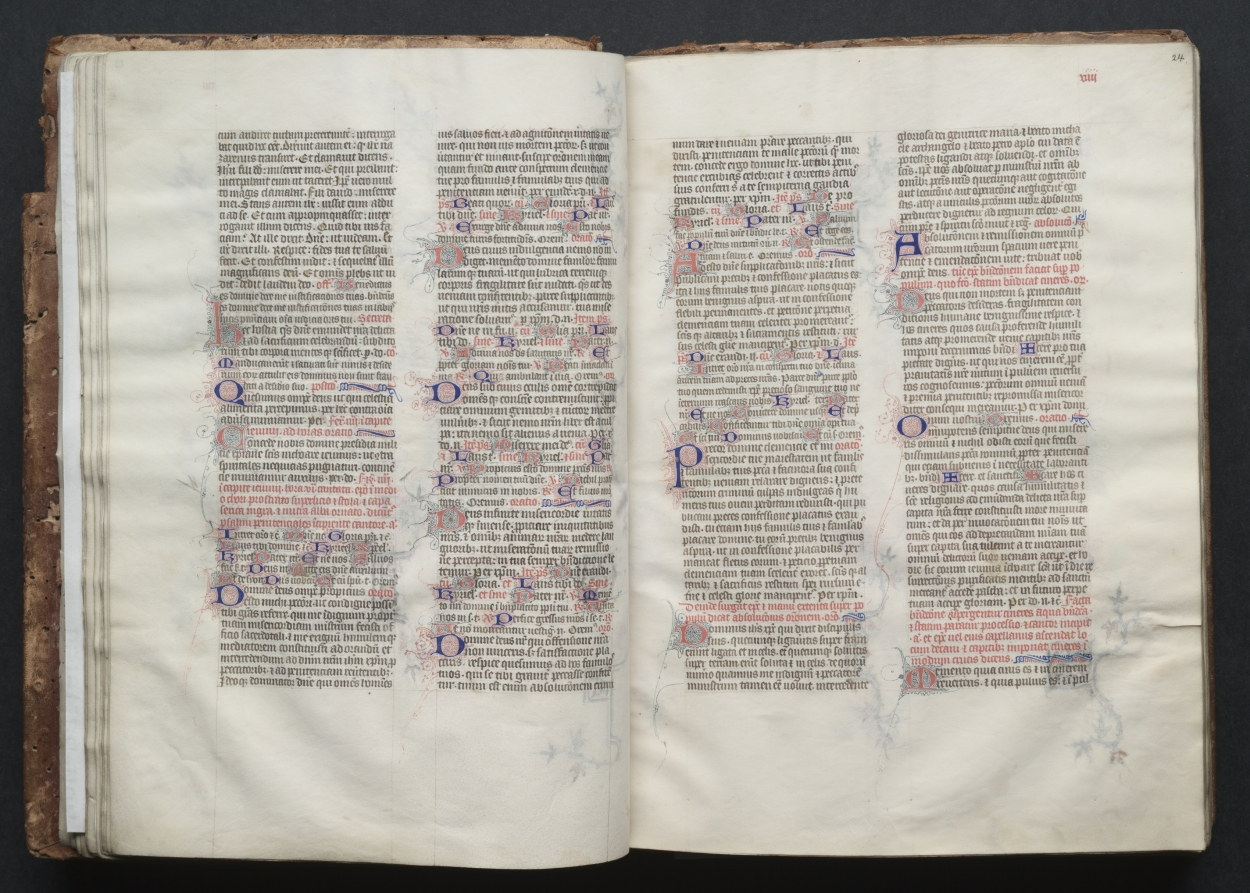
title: The Gotha Missal: Fol. 24r, Text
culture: France, Paris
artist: Master of the Boqueteaux (French)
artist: and Workshop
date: c. 1375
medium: ink, tempera, and gold on vellum; blind-tooled leather binding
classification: Bound Volume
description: The style and quality of this manuscript's decoration is typical of deluxe Parisian books made for aristocratic or royal patrons. Most of the book's decoration appears to be the work of the Master of the Boqueteaux, an artist active at the court of King Charles V (died 1380). His style was apparently shared by a number of book illuminators working in and around Paris. It is very possible that the Gotha Missal belonged to Charles V, but is not provable because the manuscript has no royal portraits and lacks a colophon. Given the book's magnificent decoration, however, it would seem that it was produced for a Valois prince, if not for the king himself. The manuscript receives its name from the German dukes of Gotha, its later owners.